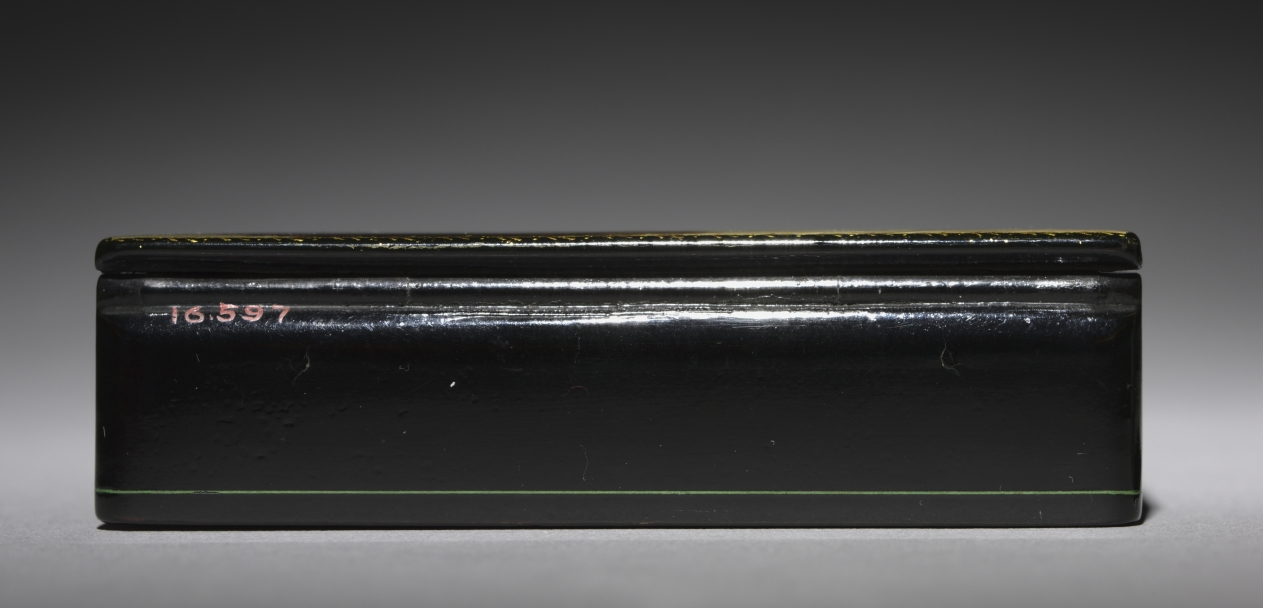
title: Snuff Box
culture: Russia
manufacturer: Lukutin Factory (Russian, 1818–1904)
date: 1800s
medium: wood with black lacquer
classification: Miscellaneous